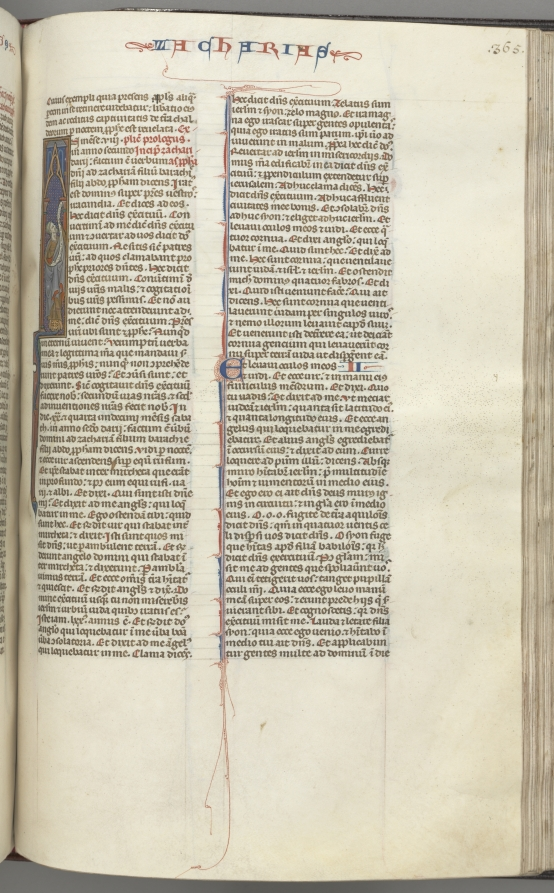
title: Fol. 365r, Zachariah, historiated initial I, Zachariah standing with a scroll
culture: Southern France, Toulouse(?), 13th century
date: c. 1275–1300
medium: ink, tempera and gold on vellum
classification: Bound Volume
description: Biblical manuscripts were highly prized and important possessions of churches, monasteries, cathedral schools, and universities throughout medieval Europe. The biblical texts were known as the vulgate, the translations made by Saint Jerome in the fourth century from Hebrew and Greek into Latin, which became the definitive and official Latin version of the Roman Church. In the 13th century, the bible was, for the first time, produced as a single volume with an officially sanctioned sequence to its books and chapters as illustrated by this example. The very extensive decoration of this bible is arranged hierarchically to indicate the relative importance of the various texts so that full or almost full-page initials mark the openings of the first prologue, Genesis, and the first Gospel; historiated initials mark the beginning of each book and illuminated initials mark the Prologues.